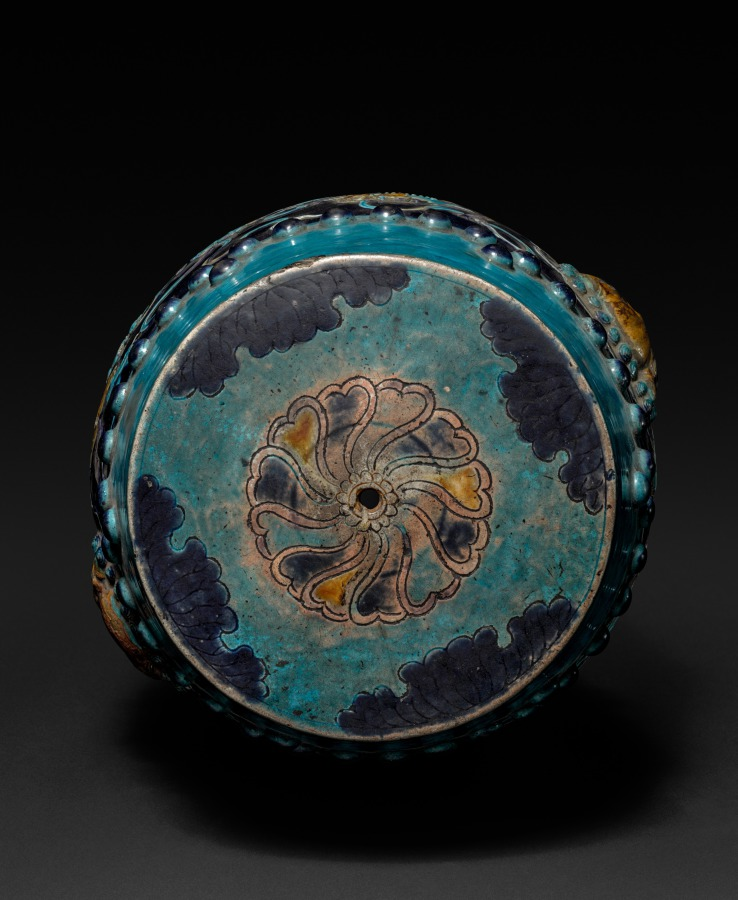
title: Garden Seat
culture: China, Jiangxi Province, Ming dynasty (1368–1644)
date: 1368–1644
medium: porcelain, Fahua ware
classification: Ceramic